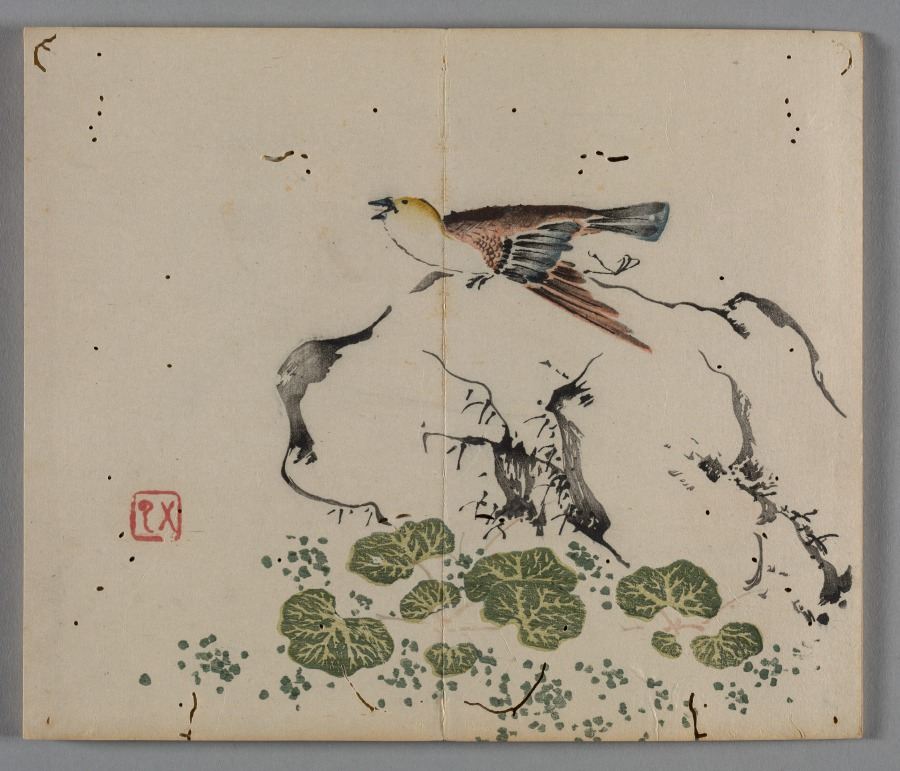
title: Ten Bamboo Studio Painting and Calligraphy Handbook (Shizhuzhai shuhua pu): Birds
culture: China, Qing dynasty (1644-1911)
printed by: Hu Zhengyan (Chinese, c. 1584–1674)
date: 1633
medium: Woodblock-printed book; ink and colors on paper; first edition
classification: Print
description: Color printing reached a level of perfection in the early 1600s, as seen in this Ten Bamboo Studio Collection of Calligraphy and Painting and the Mustard Seed Garden Manual of Painting (printed 1679 and 1701). The painterly quality, precision in registering (aligning) the woodblocks, and harmonious colors made them the most successful color print editions in Chinese history. Both editions were printed and compiled in Nanjing, spread nationwide, and had a great impact on the arts in Japan and Korea.